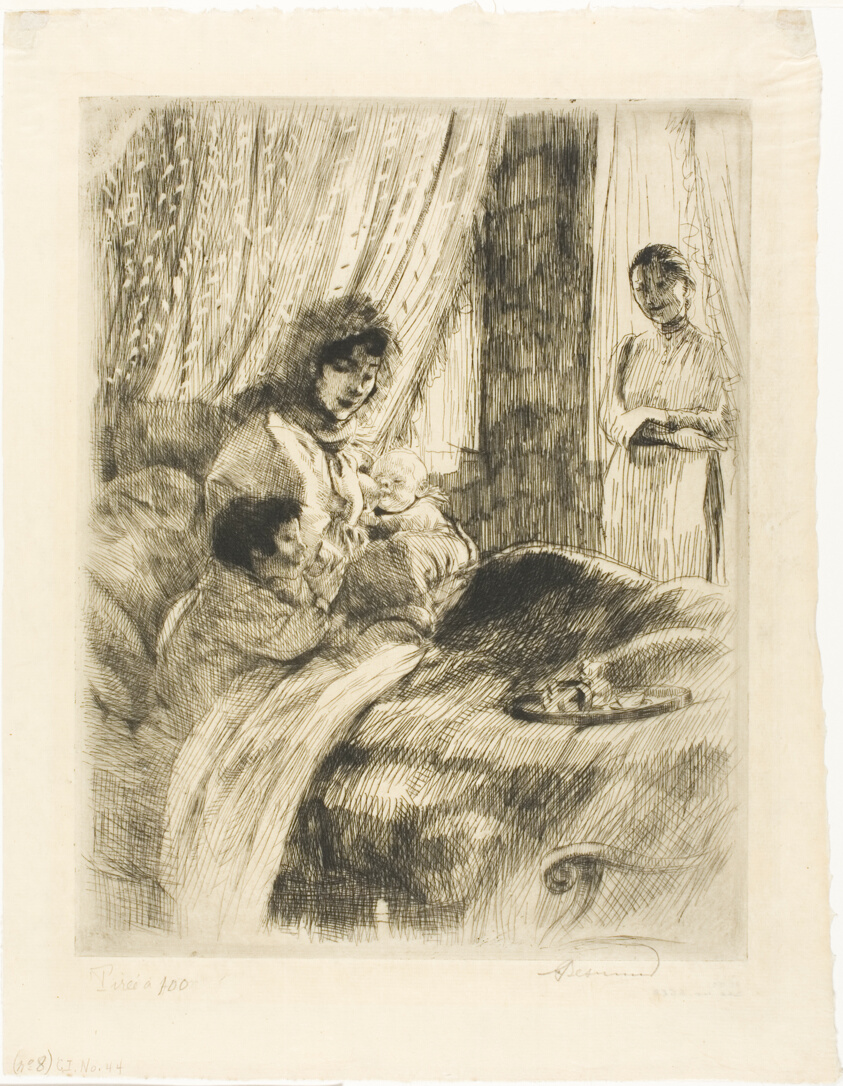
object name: Print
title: Breakfast, plate four from Woman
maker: Albert Besnard (French, 1849-1934)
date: c. 1886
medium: Etching in black on cream Japanese paper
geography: France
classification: etching; print; prints and drawing